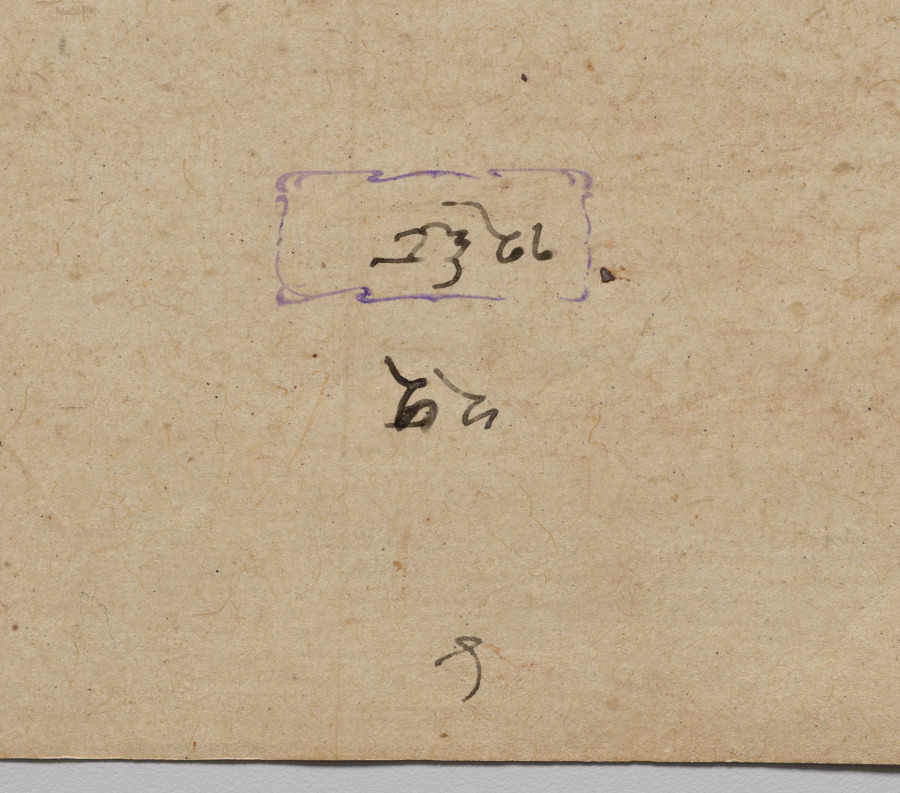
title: Mars, from a Mandi Astrology Series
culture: Northern India, Pahari kingdoms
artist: attributed to Sanju (Indian, active late 1700s–early 1800s)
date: c. 1810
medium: Gum tempera and gold on paper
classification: Painting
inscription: On the verso is the number four, in devanagari notation, written on the top and bottom edges.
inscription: The purple stamp of the kingdom of Mandi’s royal library bears the handwritten number 1268. Above is the number 22.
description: This page is from a series of paintings featuring astrological subjects, including personifications of planets and signs of the zodiac. Historically in India, the auspicious conjunction of planets with certain calendar dates was important for determining when to schedule events or ceremonies. Mars is depicted as a warrior with green skin and riding a tiger through the sky.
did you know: The god Mars in Roman mythology is also a warrior.